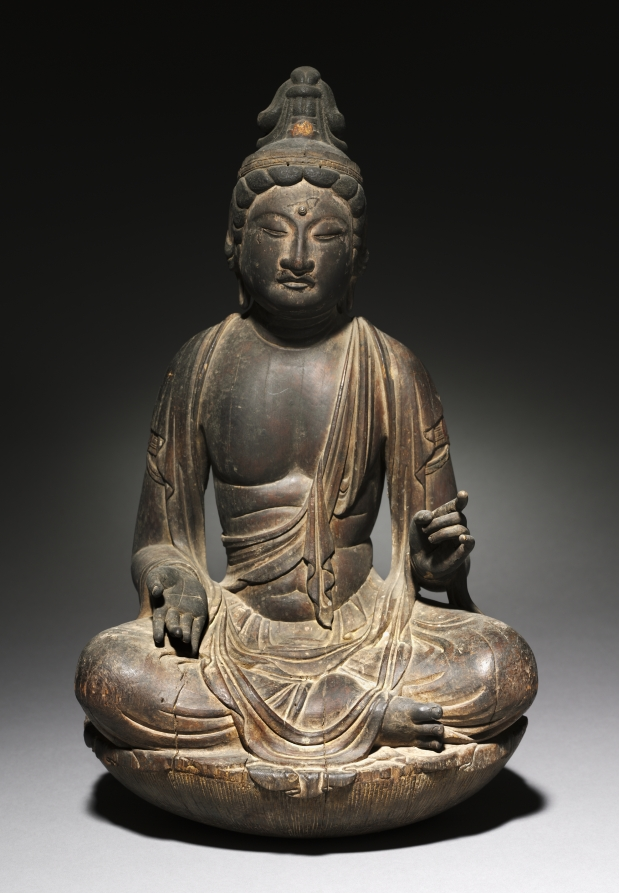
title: Sun Bodhisattva (Nikkō Bosatsu)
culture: Japan, Heian period (794–1185)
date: c. 800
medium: Japanese nutmeg-yew wood with traces of color and gold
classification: Sculpture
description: Bodhisattvas are beings who have attained enlightenment but delay entry into Buddhahood until they have fulfilled their varied vows to aid others along the path to enlightenment. The flowing robes and curving posture of this figure were inspired by Chinese Buddhist sculpture. However, the interplay of the wood grain in this single block of yew with the artist’s subtle carving is a Japanese innovation. Originally paired with the Moon Bodhisattva (Gekkō Bosatsu), this figure likely flanked a sculpture of the Medicine Master Buddha (Yakushi Nyorai).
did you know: Japanese nutmeg-yew, or kaya, was used as a replacement for the unobtainable sandalwood of which small Buddhist sculptures imported from China were made.